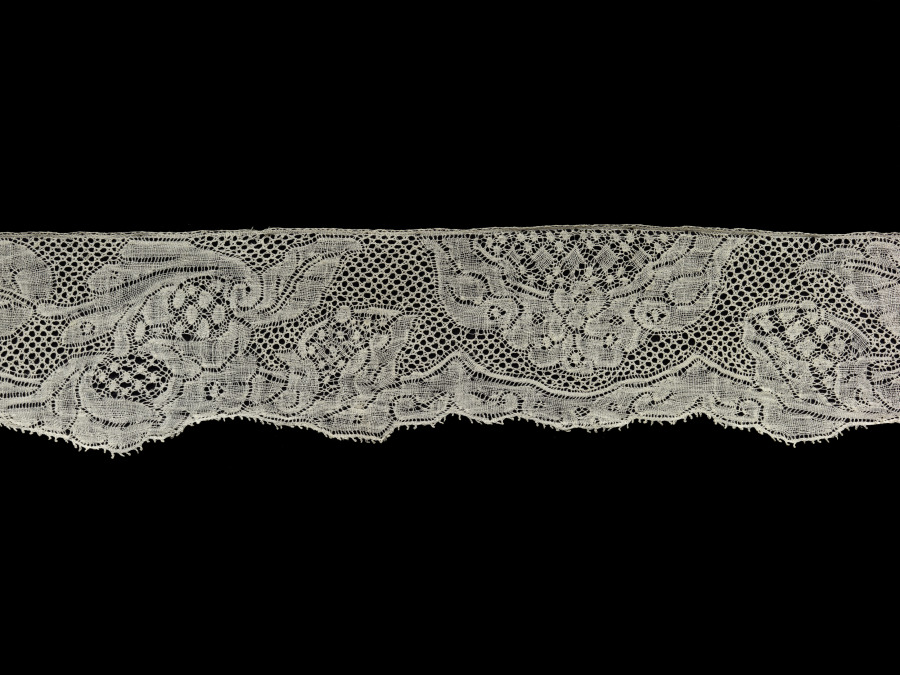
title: Lace Edging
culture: Belgium, Binche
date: 1740–60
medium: Bobbin lace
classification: Lace